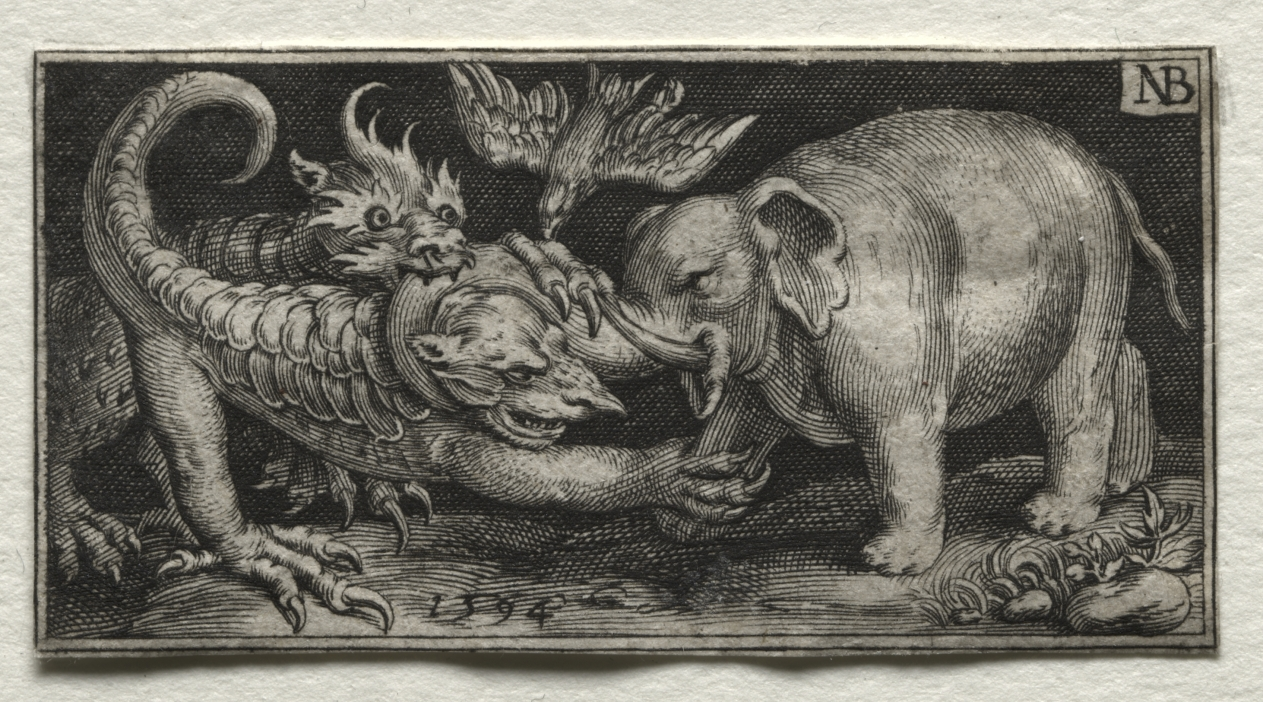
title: Elephant Fighting two Beasts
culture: Netherlands, 16th century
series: Fighting Chimeras and Scenes to Aesop's Fables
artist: Nicolaes de Bruyn (Netherlandish, 1571–1656)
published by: A. van Londerseel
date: 1594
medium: engraving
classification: Print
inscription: upper right, in plate: NB[in monogram] ; lower center, in plate: 1594) ; VERSO, lower left, in graphite: 74[upsidedown] lower left, in graphite: 237[3?] ; lower left, in graphite: B4241 ; lower center, in graphite: 9[circled] FPO ; lower right, in graphite: 6264/130